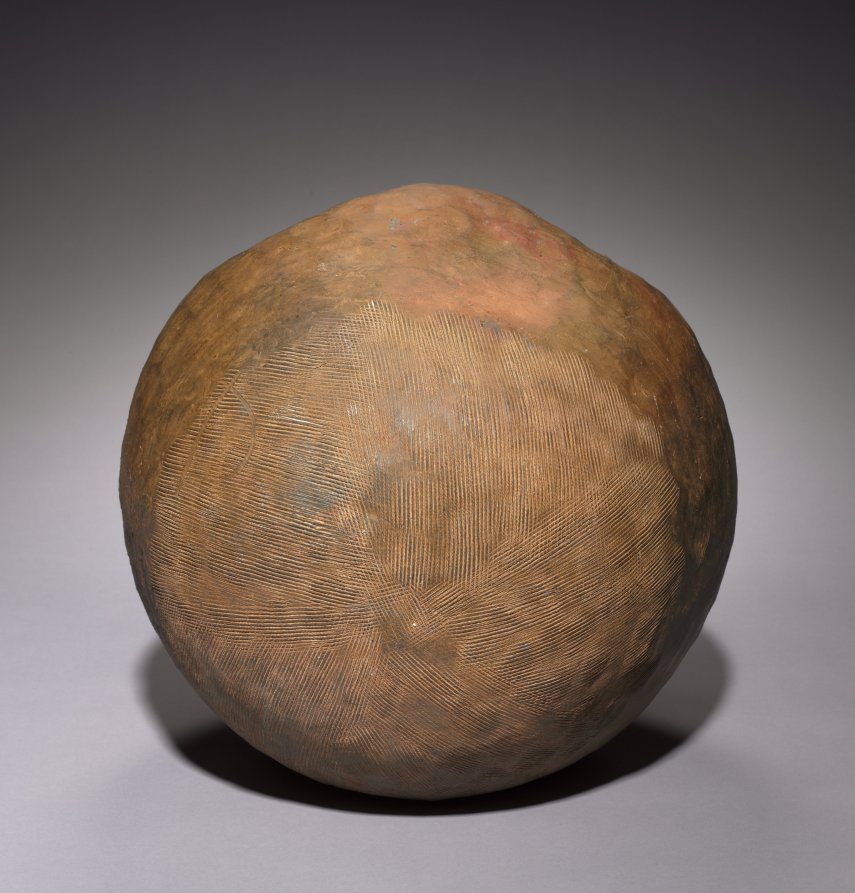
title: Short-necked Storage Jar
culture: Korea, Three Kingdoms period (57 BCE–668 CE)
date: 300s CE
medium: gray earthenware with impressed cord design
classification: Ceramic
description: Early earthenware from the Three Kingdoms period is characterized by the jar's gray hue. Closed kiln chambers built on hillsides, which fired clay as high as 2000°F, maintained a low level of oxygen saturation. The loops on its round shoulder suggest that the jar once had a lid fastened by cords. The function of this type of large jar remains unknown, yet it is highly possibly that it was used to store harvested grains and seeds. The pounding technique (tanal in Korean) used to treat the surface strengthened the clay body.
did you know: The surface of this pottery jar was treated by the pounding technique.